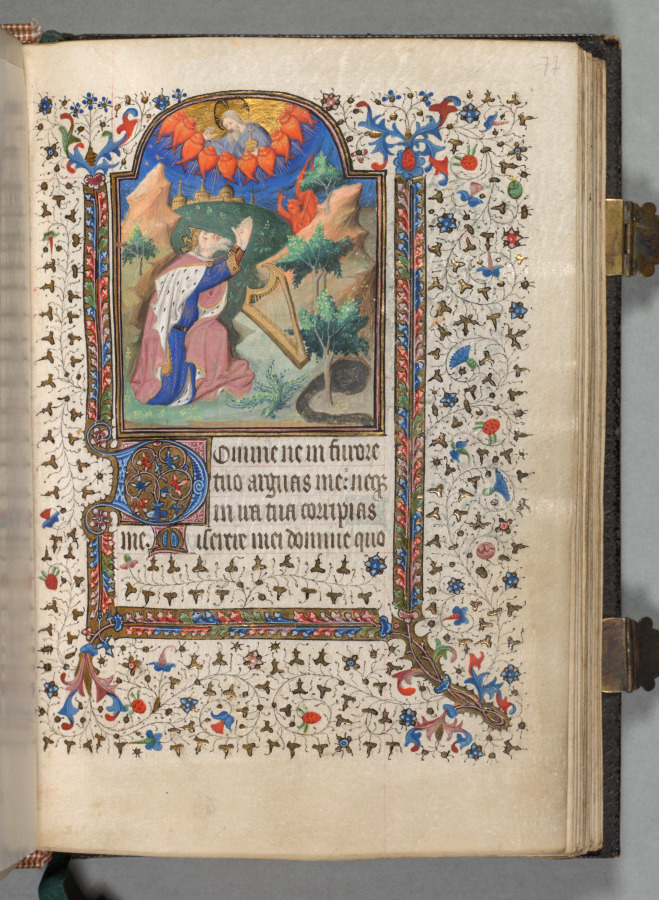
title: Book of Hours (Use of Paris): Fol. 77r, David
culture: France, Paris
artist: possibly studio or workshop of The Bedford Master (French, Paris, active c. 1405–30)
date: c. 1420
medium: ink, tempera, and gold on vellum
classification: Bound Volume